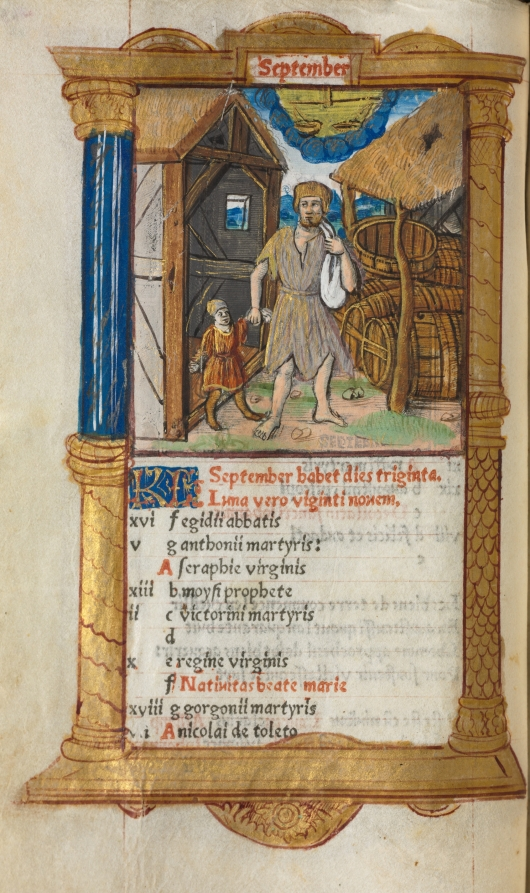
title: Printed Book of Hours (Use of Rome): fol. 10v, September calendar illustration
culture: France, Paris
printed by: Guillaume Le Rouge (French, Paris, active 1493–1517)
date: 1510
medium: 112 Printed folios on parchment, bound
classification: Bound Volume